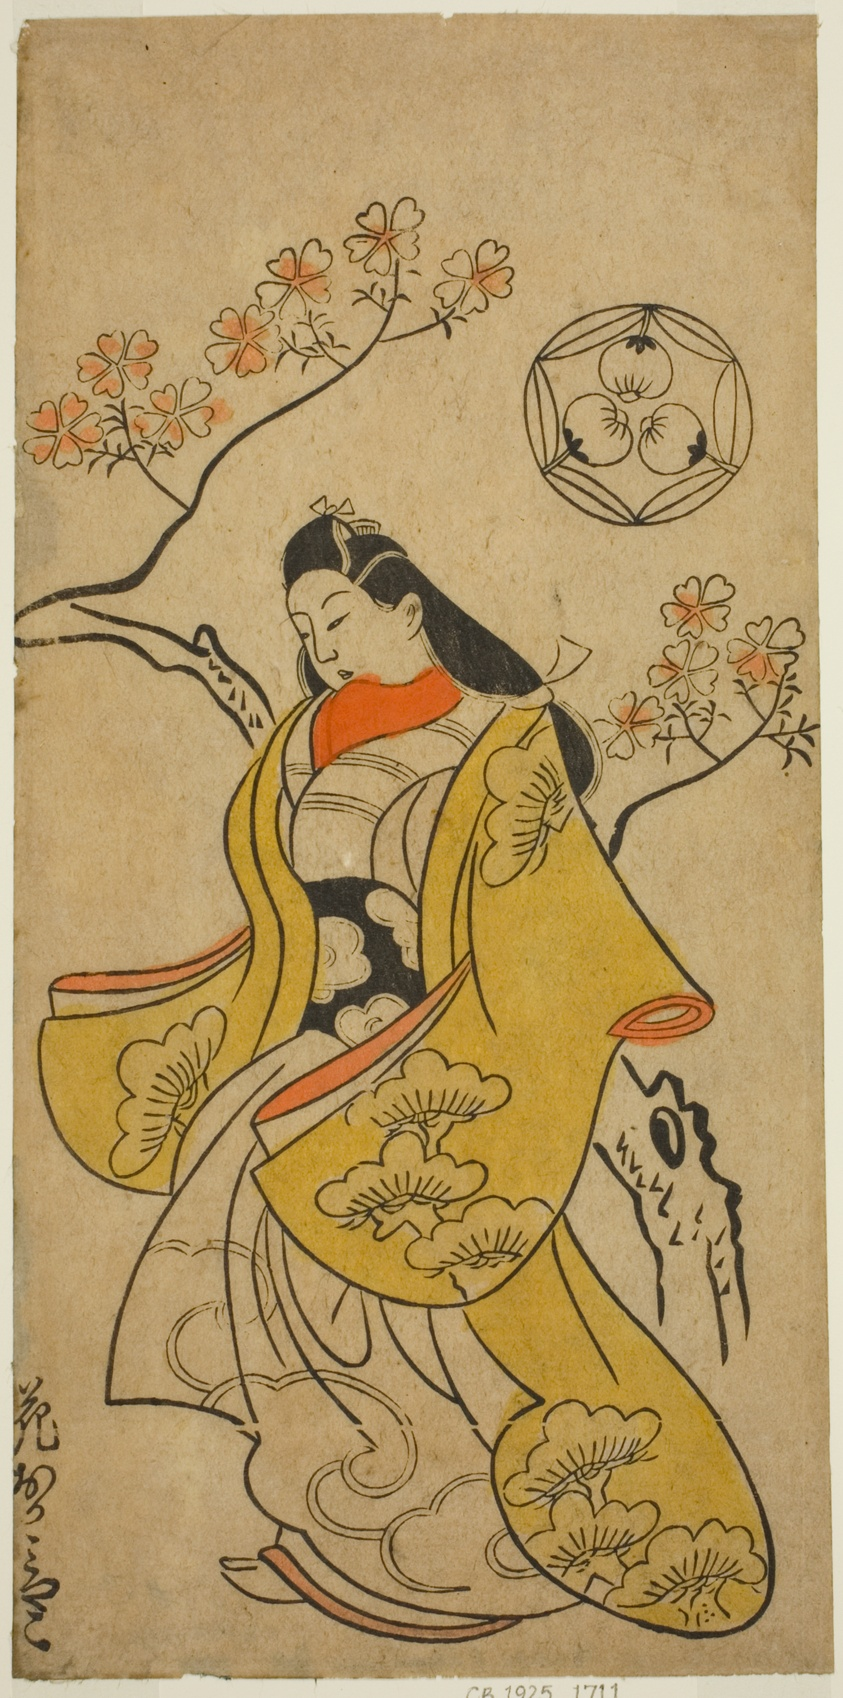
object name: Print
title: The Actor Hanaoka Miyako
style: Japanese (culture or style)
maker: Attributed to Torii Kiyonobu I; Japanese, 1664-1729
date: c. 1700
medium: Hand-colored woodblock print; hosoban, tan-e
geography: Japan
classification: woodblock print; print; asian art